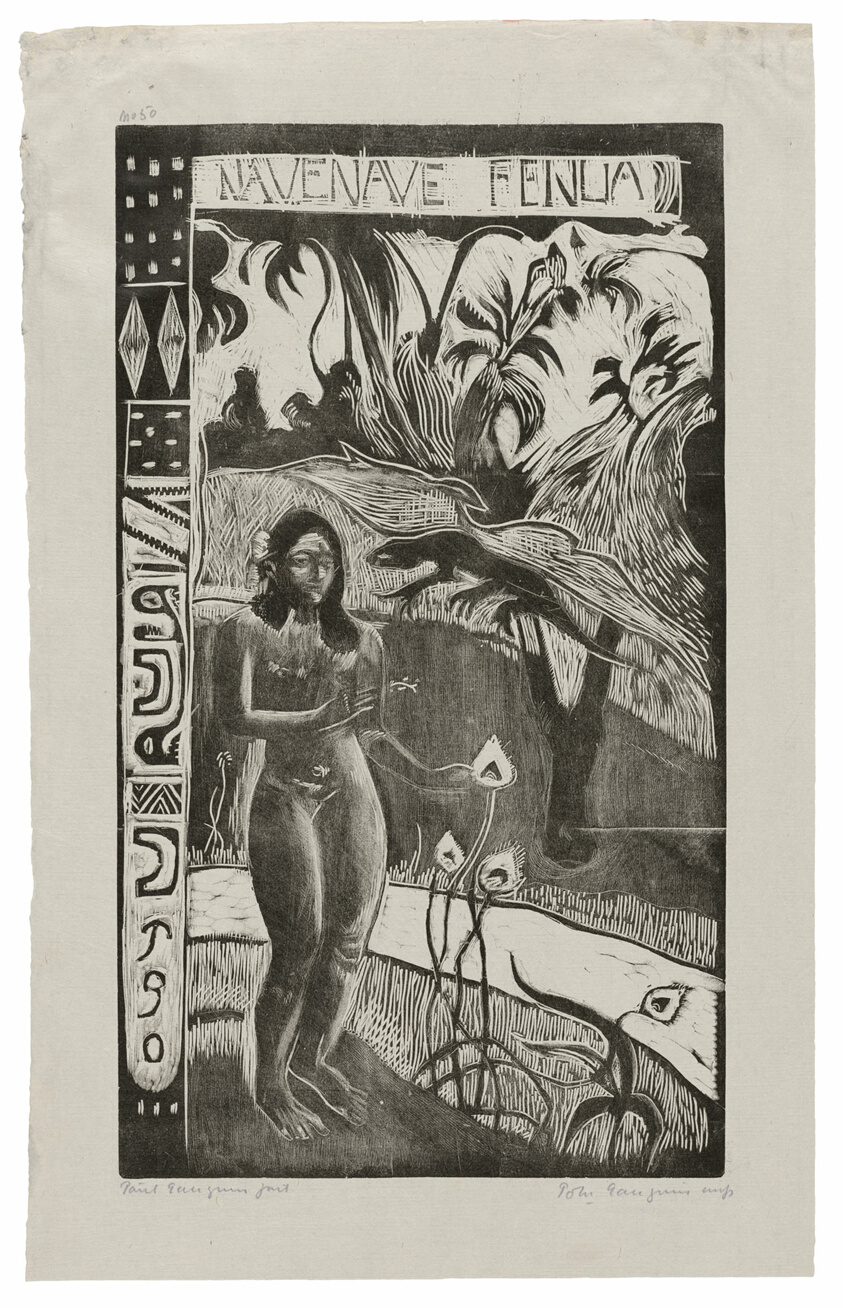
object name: Print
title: Nave nave fenua (Delightful Land), from the Noa Noa Suite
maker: Paul Gauguin (French, 1848-1903); printed by Pola Gauguin (Danish, born France, 1883-1961); published by Christian Cato, Copenhagen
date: 1893/94, printed 1921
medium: Wood-block print in black ink on grayish-ivory China paper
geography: France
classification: woodcut; print; prints and drawing